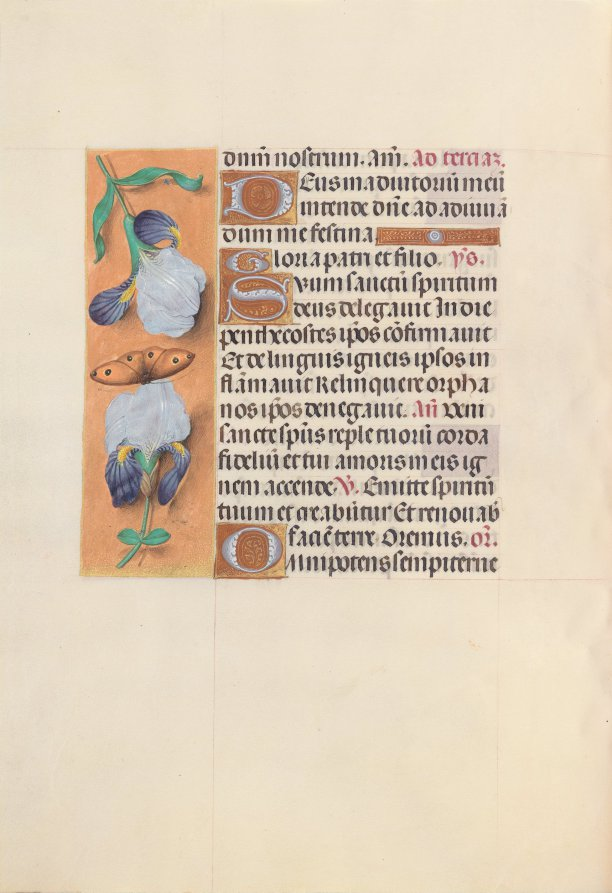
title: Hours of Queen Isabella the Catholic, Queen of Spain: Fol. 33v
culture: Flanders, Ghent and Bruges, late 15th century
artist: Master of the First Prayerbook of Maximillian (Flemish, c. 1444–1519)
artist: and Associates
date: c. 1500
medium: ink, tempera, and gold on vellum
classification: Bound Volume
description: A great lover of Flemish art, Queen Isabella treasured her many devotional books. This deluxe manuscript was created for her private devotions by highly organized and distinctly talented manuscript painters active in Ghent and Bruges. The Ghent-Bruges school represents the culmination of Flemish book painting, whose main features were the use of rich colors, illusionistic effects, a love of landscape, and a strong sense of visual narrative. Manuscripts produced by this circle of artists are renowned for their border decoration featuring a rich variety of realistically painted flowers, scrolling acanthus leaves, birds, and butterflies.